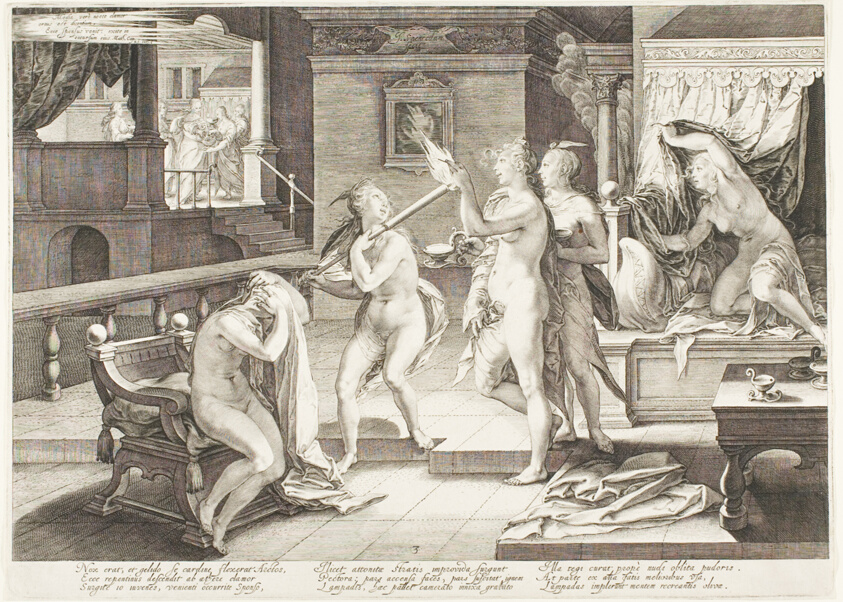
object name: Print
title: Plate Three, from Five Wise and Five Foolish Virgins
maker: Jan Saenredam (Dutch, 1565-1607)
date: 1606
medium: Engraving on paper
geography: Netherlands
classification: engraving; print; prints and drawing